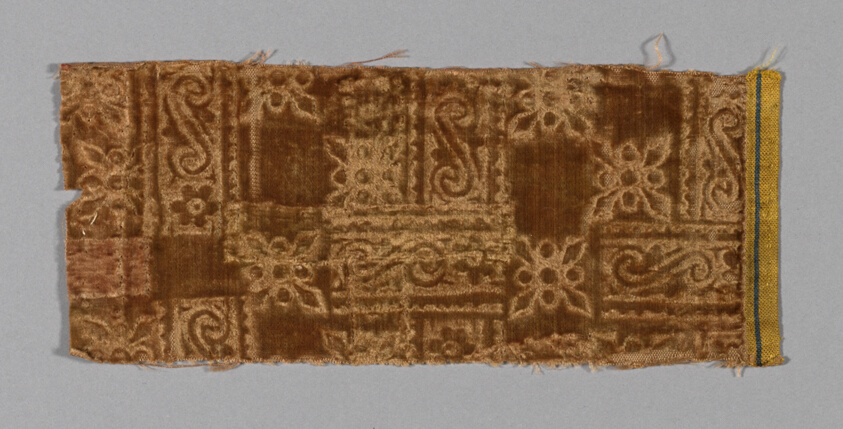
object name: Textile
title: Fragment (Dress Fabric)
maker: Italy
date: 17th century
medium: pressed and cut velvet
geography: Italy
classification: textile; weaving - velvet; weaving